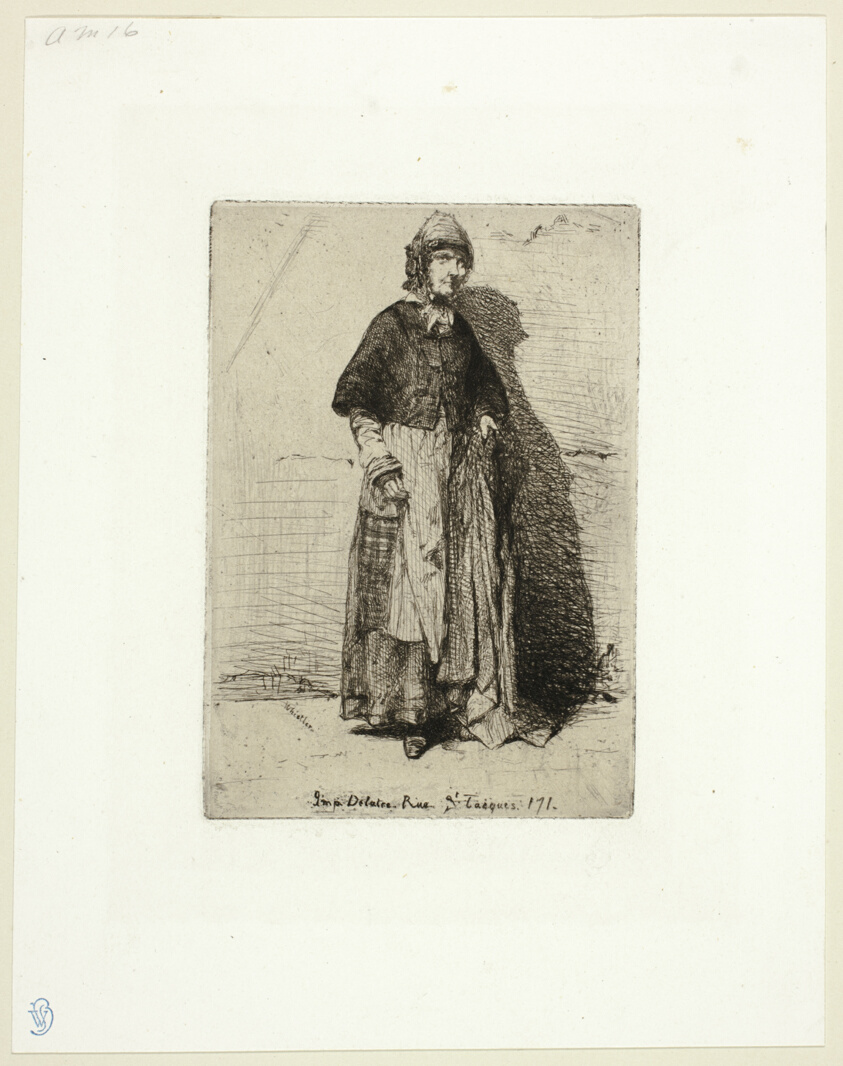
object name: Print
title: La Mère Gérard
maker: James McNeill Whistler (American, 1834-1903)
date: 1858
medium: Etching in black ink on off-white China paper laid down on white wove paper (chine collé)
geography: United States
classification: etching; print; prints and drawing; paper